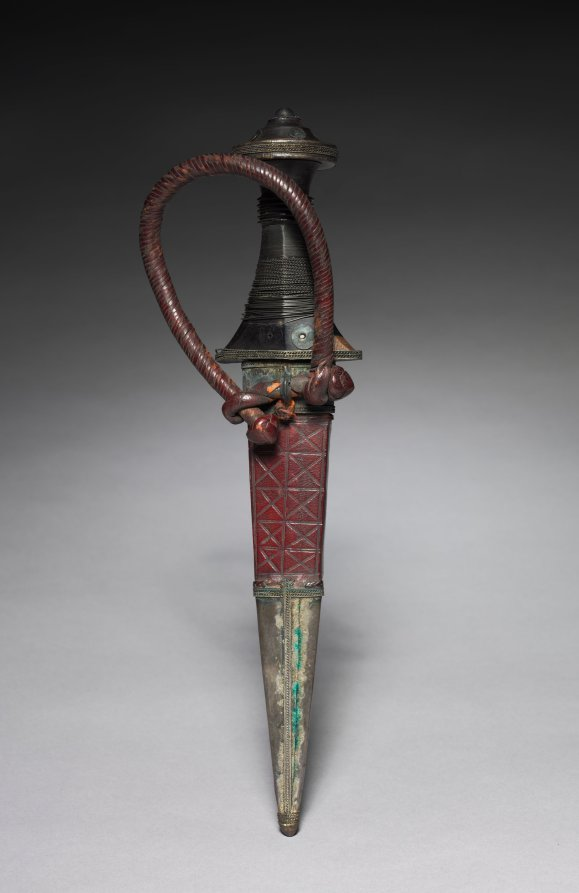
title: Dagger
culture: Africa, East Africa, Sudan, unknown maker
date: 1880–1910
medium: metal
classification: Arms and Armor